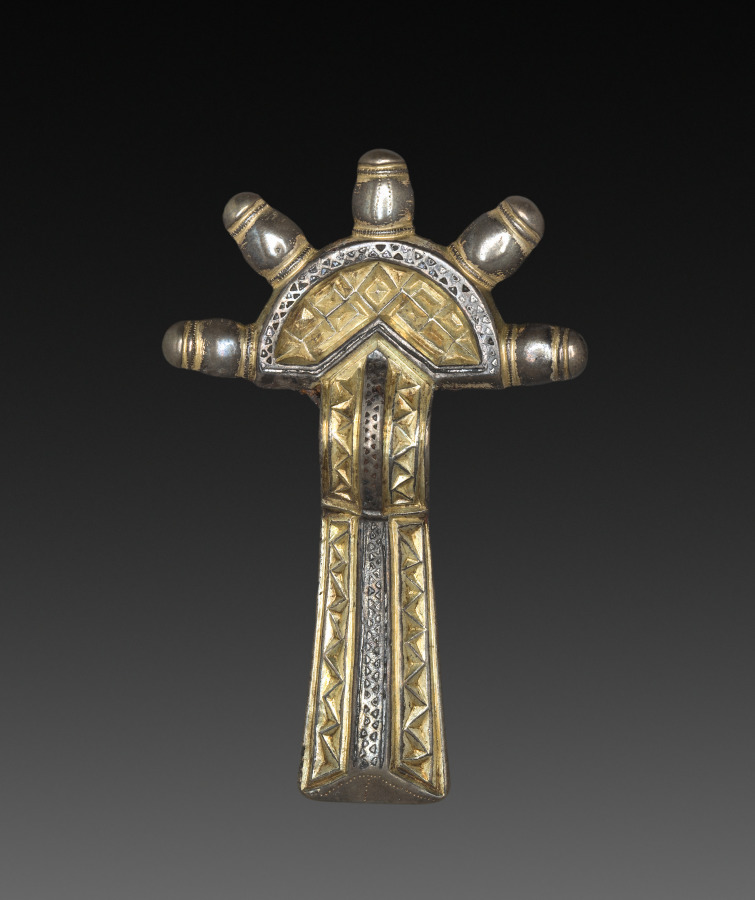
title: Bow Fibula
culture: Alemannic, 6th century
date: 500–550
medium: silver gilt and niello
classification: Jewelry